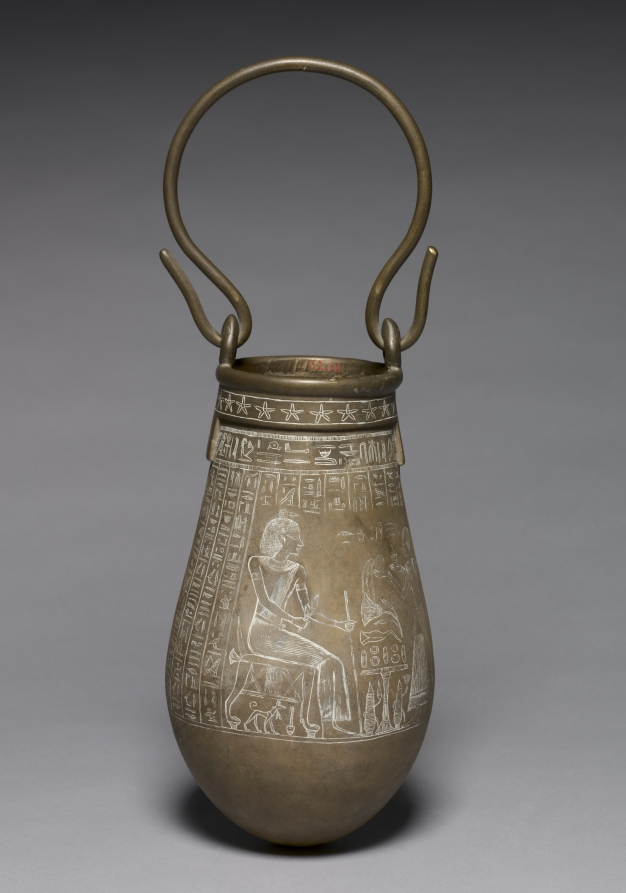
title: Decorated Situla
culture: Egypt, Greco-Roman period (332 BCE–395 CE), Ptolemaic dynasty (305–30 BCE)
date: 305–30 BCE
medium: bronze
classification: Vessels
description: The situla was a deluxe ritual vessel that played an important role in Egyptian religious ceremonies. The two scenes on this situla exemplify the dual roles of a pious Egyptian in the afterlife: receiving offerings from his family on the one hand and making offerings to the gods on the other. On one side of the vessel the deceased, Padiamennebnesuttawy ("He who Amen, lord of Karnak, gives"), sits in a low chair accompanied by his pet dog. The vertical, cross-shaped sign preceding the animal is his name, Nefer, meaning "good one" or "beautiful one." On the right, the deceased's eldest son, Amenhotep, makes offerings of incense and water to his father. On the other side the deceased demonstrates his piety by making an offering of round loaves of bread, vegetables, and meat to the gods. Opposite him are the gods who are the recipients of his offerings—Osiris, god of the dead; Horus, son of Isis; and Isis herself—each of whom wears elaborate beaded and feathered garments.